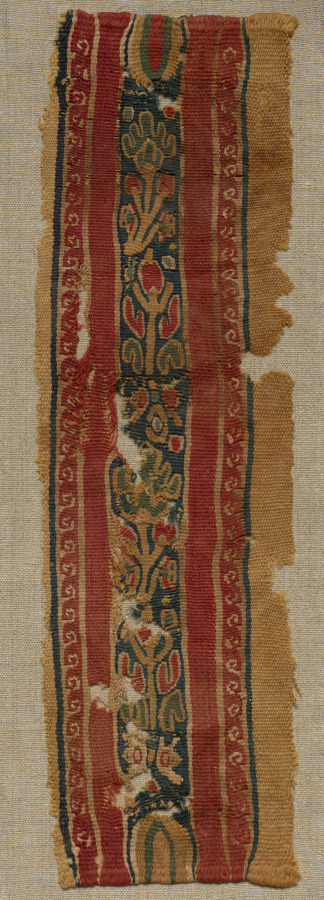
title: Fragment, with a Sleeve Band, from a Tunic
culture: Egypt, Byzantine period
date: 400s - 600s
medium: tabby with inwoven tapestry ornament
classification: Textile